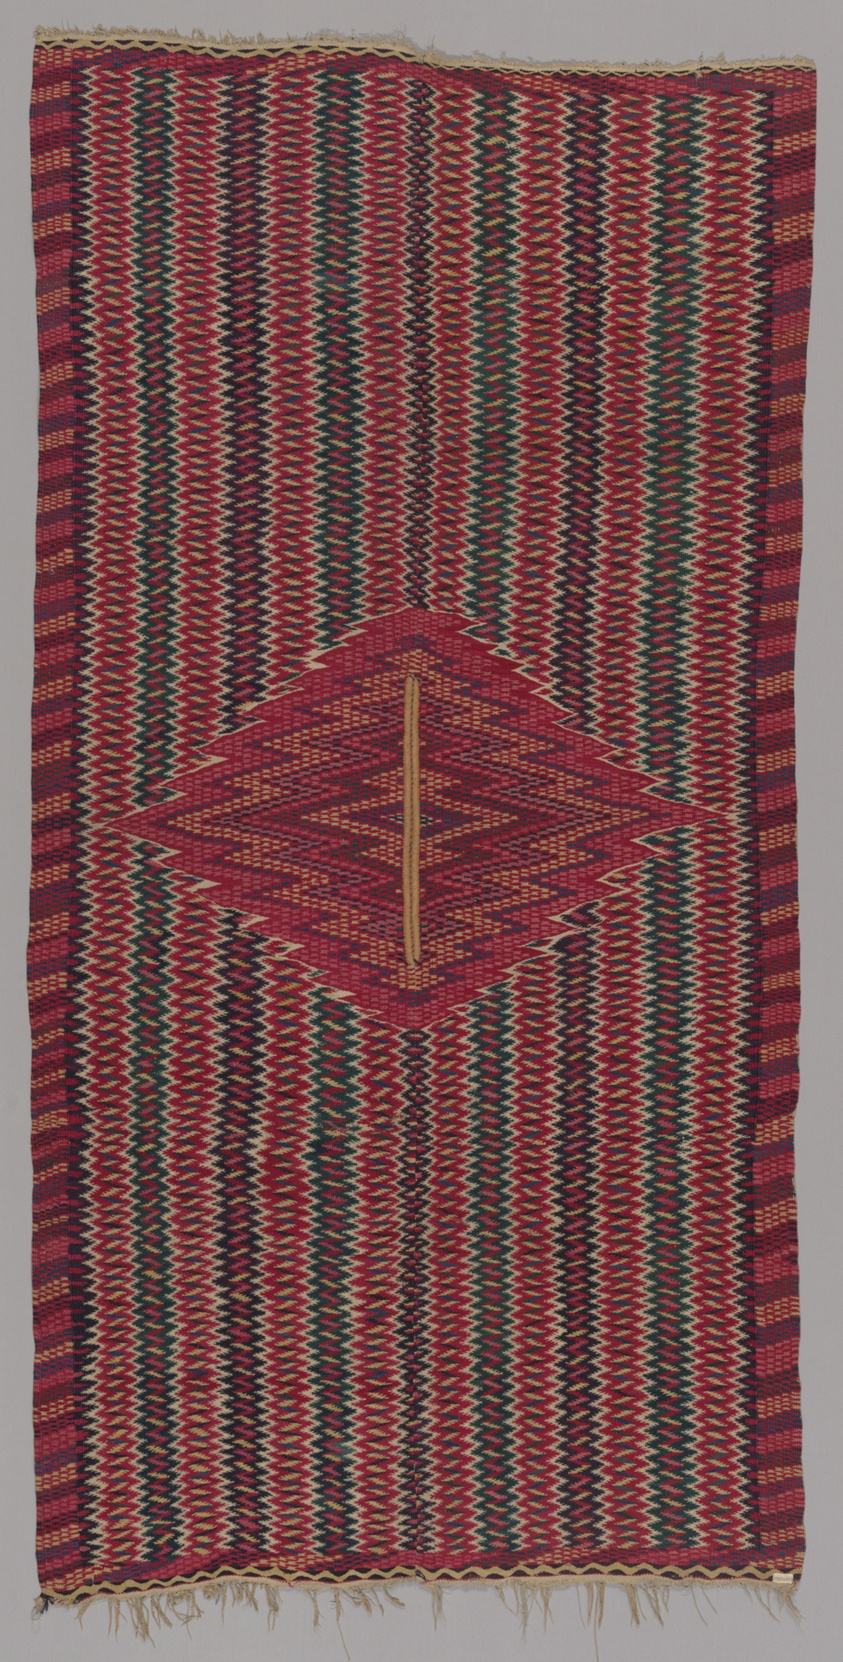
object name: Textile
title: Sarape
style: Folk Art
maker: Mexico, possibly Saltillo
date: 1750/1800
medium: Cotton and wool, single dovetail tapestry weave; neck edge tapes of cotton, plain weave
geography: Mexico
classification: textile; weaving